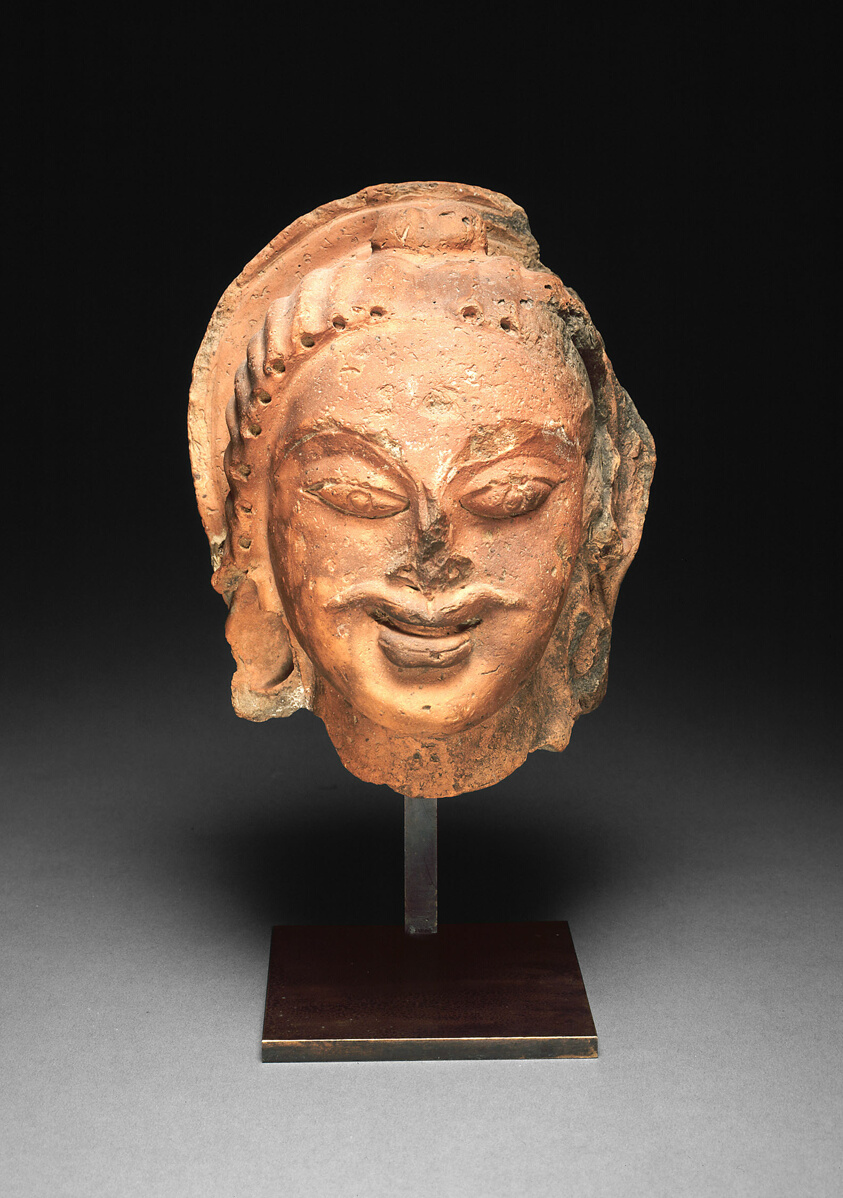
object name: Sculpture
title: Head of a Deity or a Deified King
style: South Asian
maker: India; Uttar Pradesh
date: Gupta period, 4th/5th century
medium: Terracotta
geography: Uttar Pradesh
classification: earthenware; ceramics; sculpture; asian art